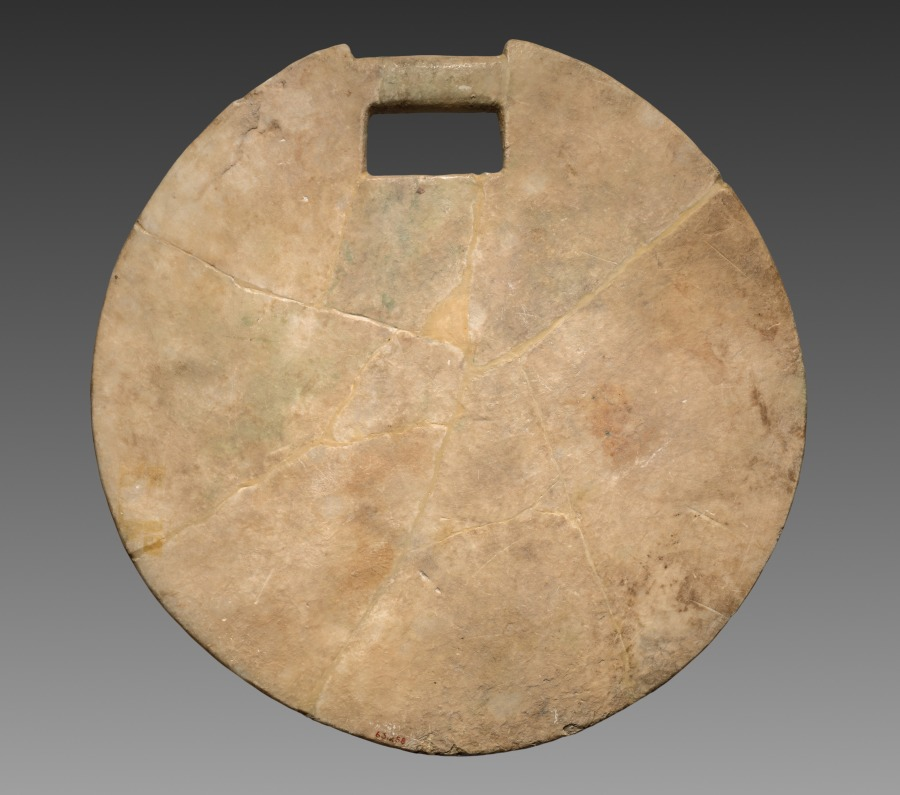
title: Sasanian King Hunting Lions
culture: Iran, Sasanian Empire (224–651 CE)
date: late 300s CE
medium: alabaster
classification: Sculpture